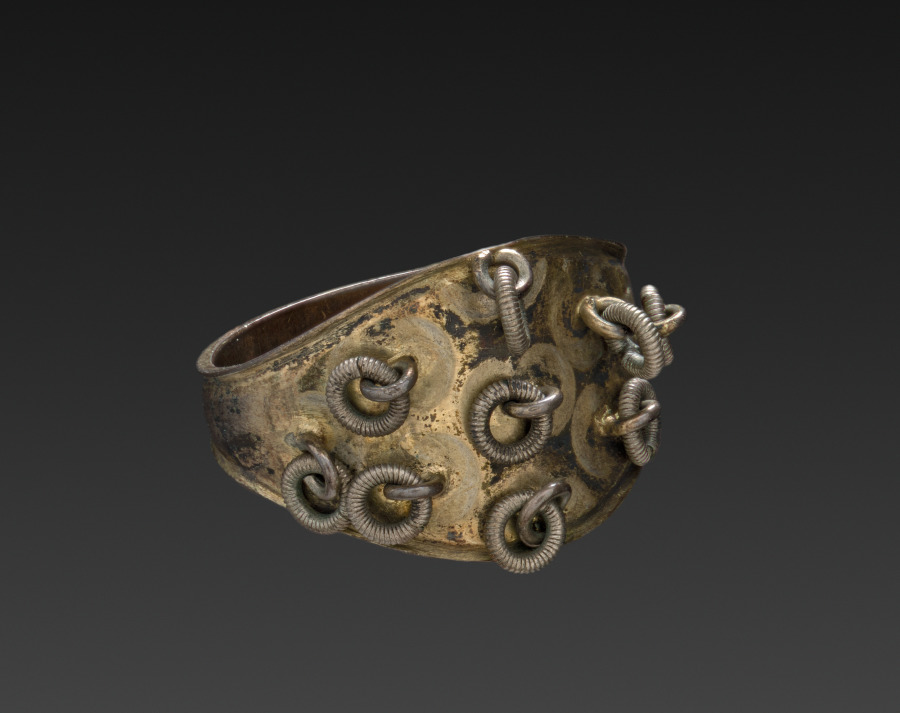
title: Ring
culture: Sweden, 18th-19th century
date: 1700s - 1800s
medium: silver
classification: Jewelry